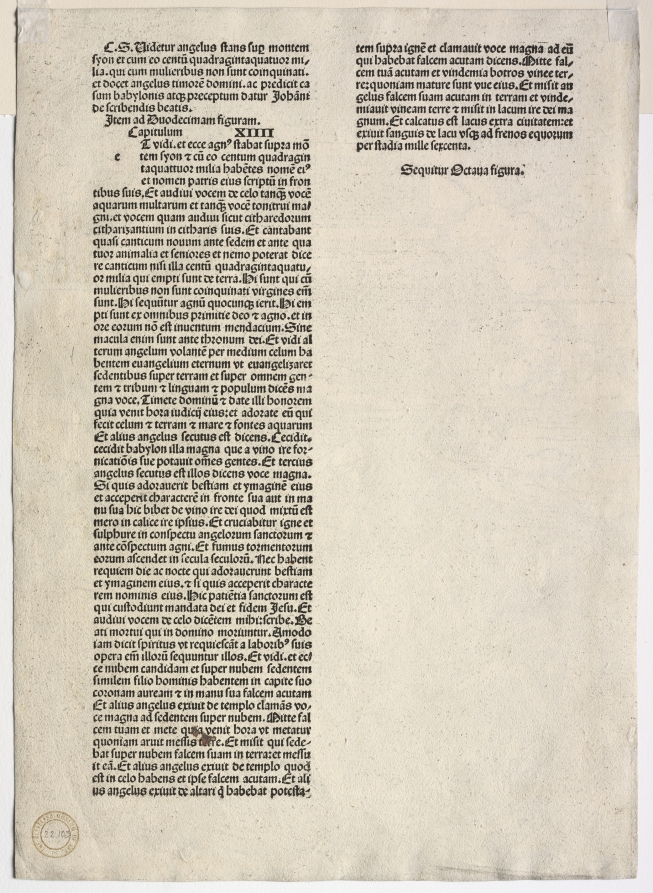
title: Revelation of St. John: The Four Destroying Angels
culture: Germany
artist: Albrecht Dürer (German, 1471–1528)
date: 1511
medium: woodcut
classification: Print